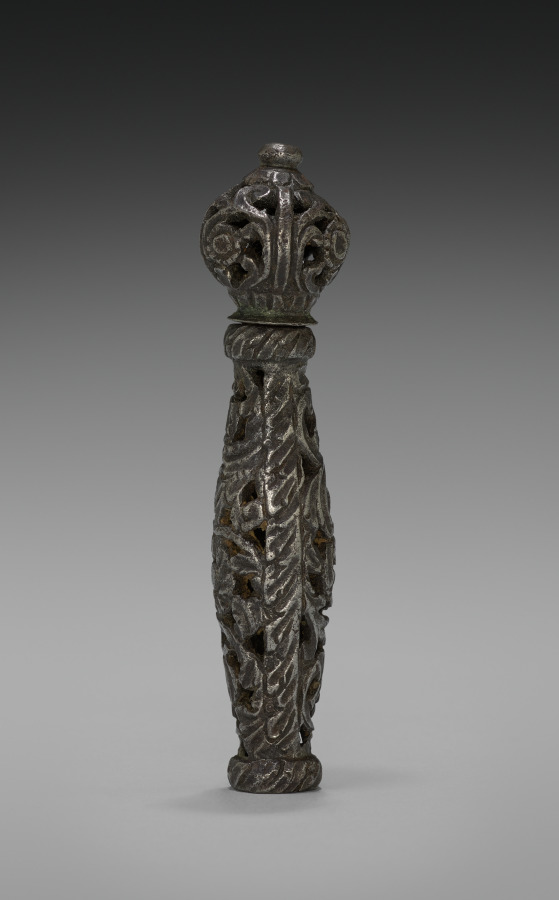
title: Pommel and Grip of Dress Sword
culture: Italy, 17th century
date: 1600s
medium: steel, chiseled, chased, and pierced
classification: Arms and Armor